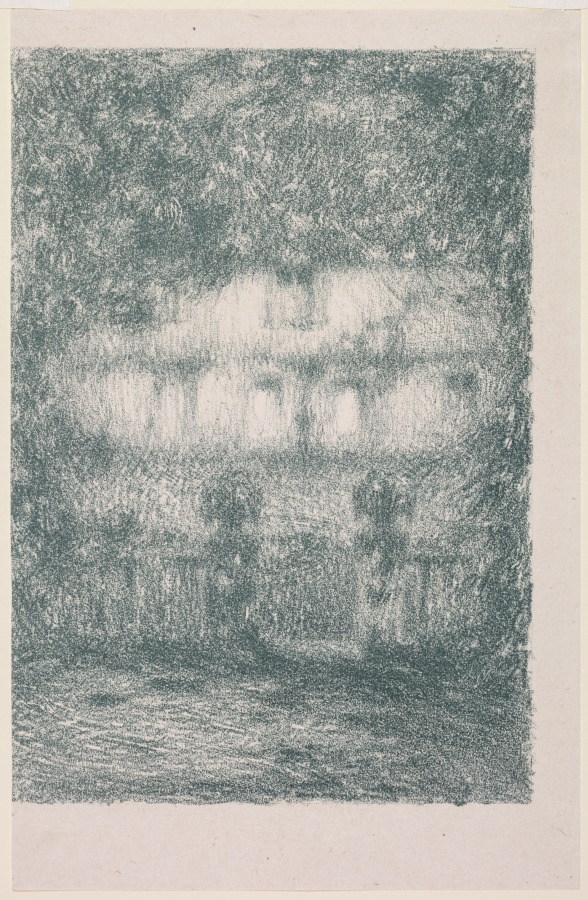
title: The House in Moonlight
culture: France, 20th century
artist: Henri Le Sidaner (French, 1862–1939)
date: 1909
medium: lithograph printed in green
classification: Print